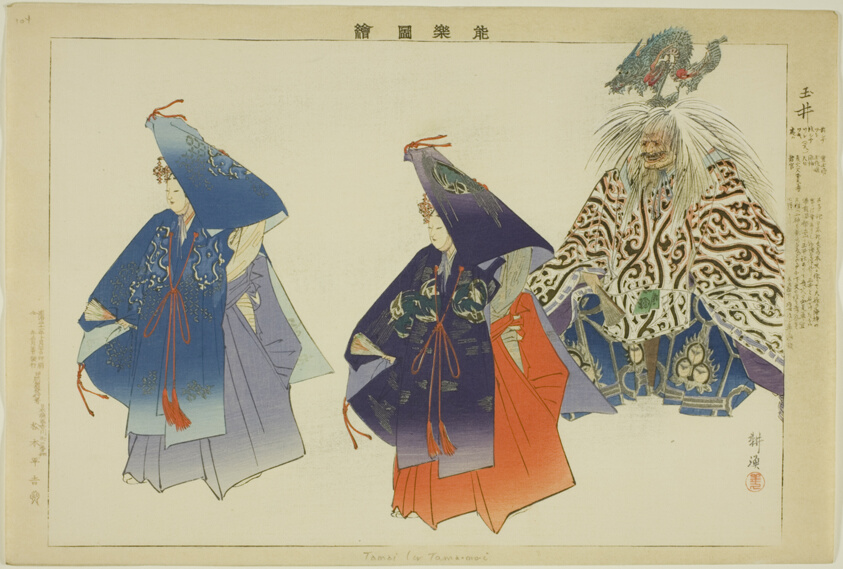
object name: Print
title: Tama-no-i, from the series "Pictures of No Performances (Nogaku Zue)"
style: Japanese (culture or style)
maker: Tsukioka Kogyo; Japanese, 1869-1927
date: 1898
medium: Color woodblock print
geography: Japan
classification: woodblock print; print; asian art